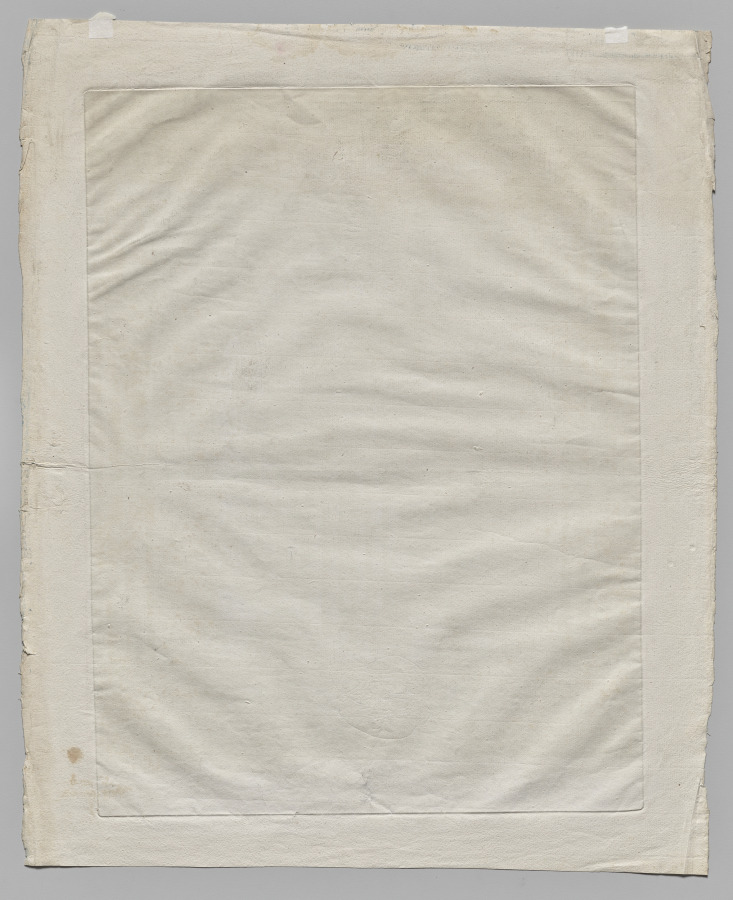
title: A View of the Stairs of the Vatican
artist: Georges Francois Blondel (French, 1730–1800)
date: 1766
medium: mezzotint printed in black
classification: Print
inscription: Imprinted on recto: “A View of the Stairs of the Vatican”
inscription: Imprinted on recto: “G.F. Blondel Del el Fecit.”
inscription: Imprinted on recto: “To his Royal Highness’ William Henry Duke of Gloucester Hc.Hc.Hc. this plate is with all Humility Dedicated by his Highness’s most humble and most ob [illegible]?/Published according to Act of Parliament by G.F. Blondel/G.F. Blondel”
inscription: Watermark: Grand-Jésus stock of T. Dupuy, watermark Name of Jesus (IHS), countermark T Dupuy Fin Auvergne 1742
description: After returning from several years spent in Italy, the French printmaker George-Francois Blondel settled in London in order to take advantage of the English taste for images of Italian sites. This is one of a series of eight prints he published in 1766 depicting imagined and real Italian interiors. Using the relatively new technique of mezzotint, which creates velvety, dark tonal areas, as well as low vantage points, Blondel created towering, awe-inspiring spaces. For special patrons, he printed the plates in sepia ink, rather than in black; the CMA’s set includes two of these unusual sepia impressions.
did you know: Mezzotint was relatively new at the time this print was made and had yet to be utilized for such large plates of an architectural nature as seen here.